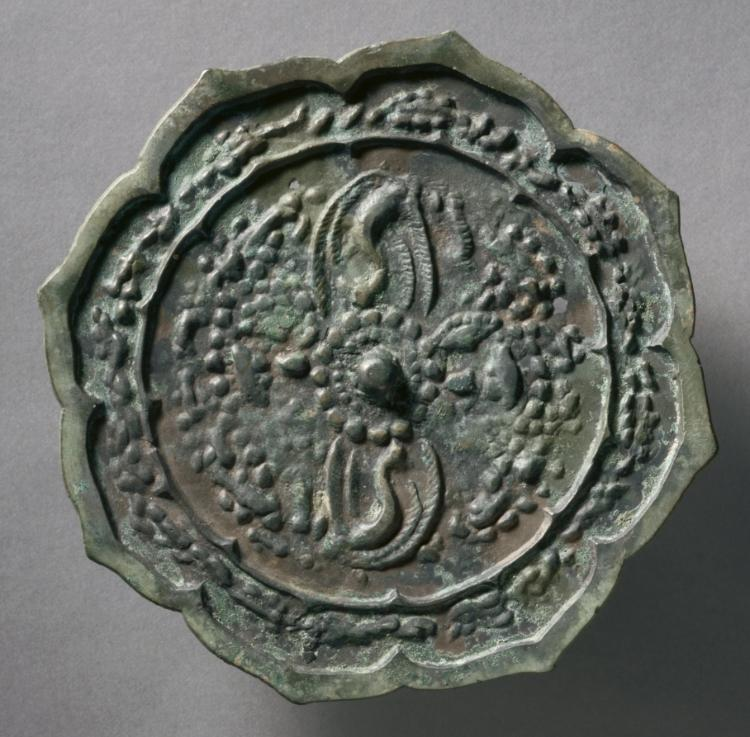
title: Octafoil Mirror with Avian and Floral Motifs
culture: China, Five dynasties (907-960)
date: early to mid 10th Century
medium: bronze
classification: Metalwork